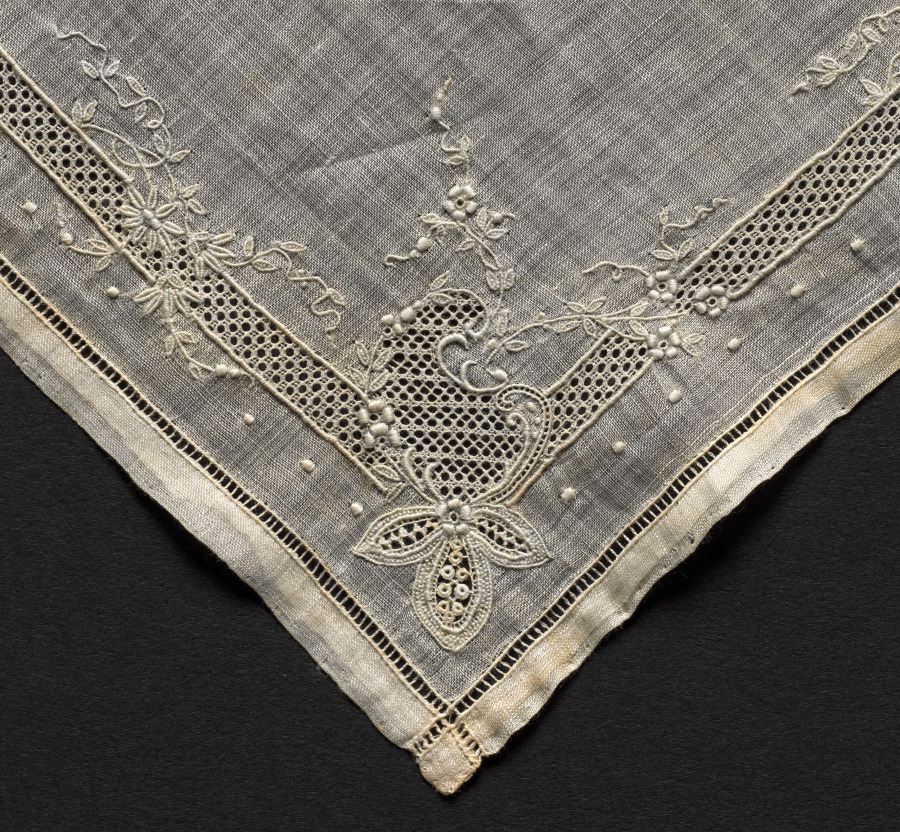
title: Lace Handkerchief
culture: Switzerland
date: 1900–1930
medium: Plain weave linen: needle lace (drawn work) and embroidery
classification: Embroidery